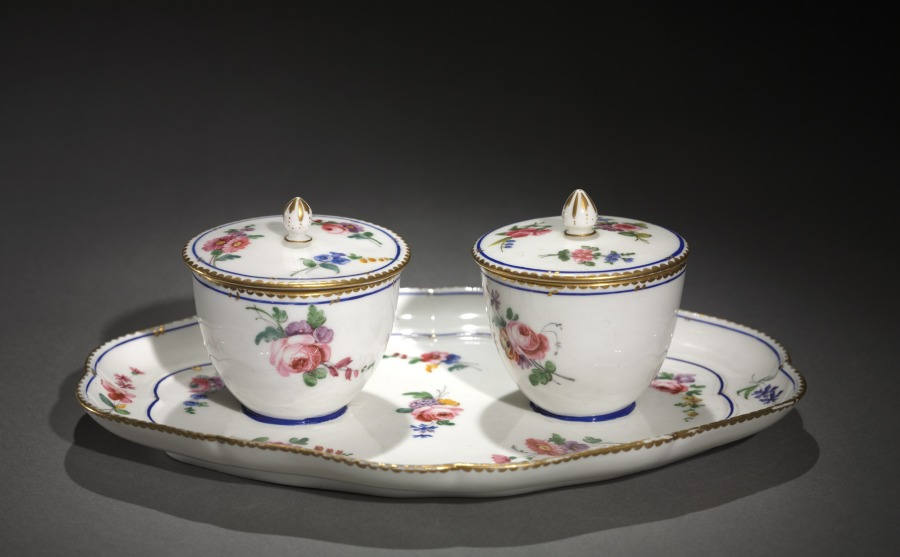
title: Jam Pots on Stand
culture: France, 18th century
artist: Sèvres Porcelain Factory (French, est. 1756)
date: c. 1760's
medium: porcelain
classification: Ceramic